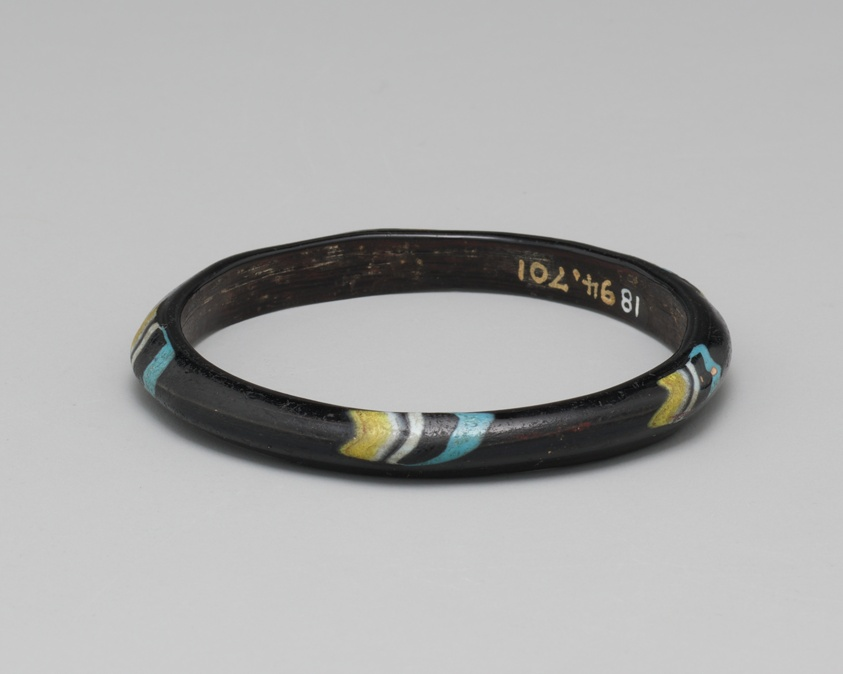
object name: Costume and Accessories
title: Bracelet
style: Islamic (culture or style)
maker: Islamic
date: 14th-15th century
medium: Glass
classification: glass; jewelry; ancient art; costume